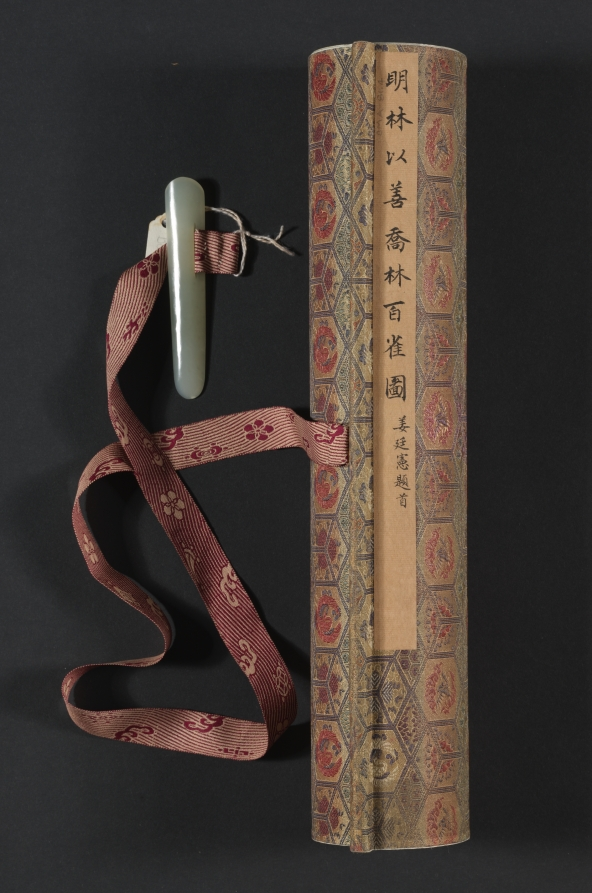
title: A Hundred Sparrows in a Lofty Grove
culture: China, Ming dynasty (1368–1644)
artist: attributed to Lin Liang (Chinese, 1416–1480)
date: 1368–1644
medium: handscroll; ink on silk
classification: Painting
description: Sparrows engaged in all kinds of activities frolic amid leafy branches, blades of grass, rocks, and a waterfall. As our eyes move over the scroll, the artist engages us in enjoying the sparrows’ carefree movements in a natural setting. The charming birds were painted from close observation in swift and fluent brushstrokes. Sparrows are a common bird and in Chinese painting they often represent the commoner in human society as opposed to the noble pheasant or peacock representative of the ruling class.